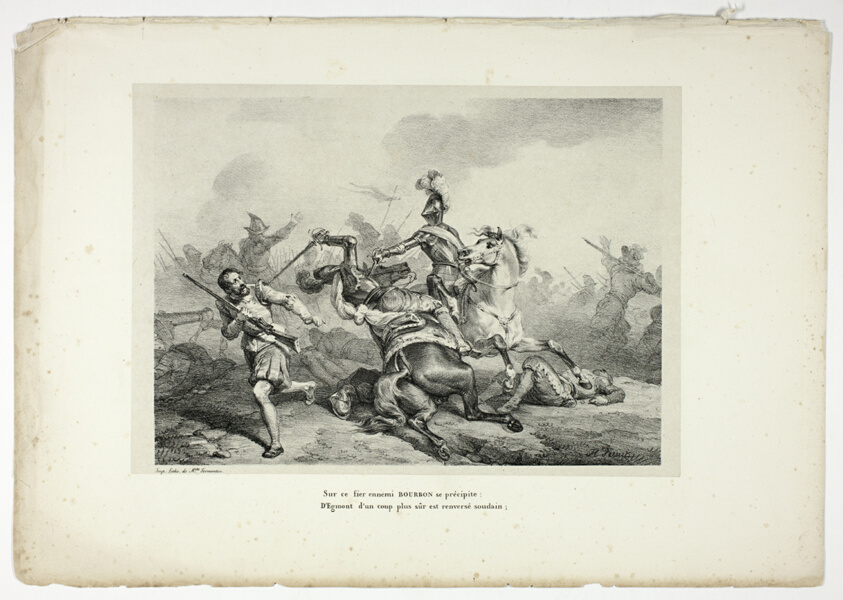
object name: Print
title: Sur ce fier ennemi BOURBON se précipite...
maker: Horace Vernet (French, 1789-1863); poem by Voltaire (French, 1694-1778); printed by Mademoiselle Formentin (French, 18th-19th century); published by Dubois (French, 18th-19th century)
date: 1825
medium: Lithograph in black on gray chine, laid down on ivory wove paper (chine collé)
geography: France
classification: lithograph; print; prints and drawing